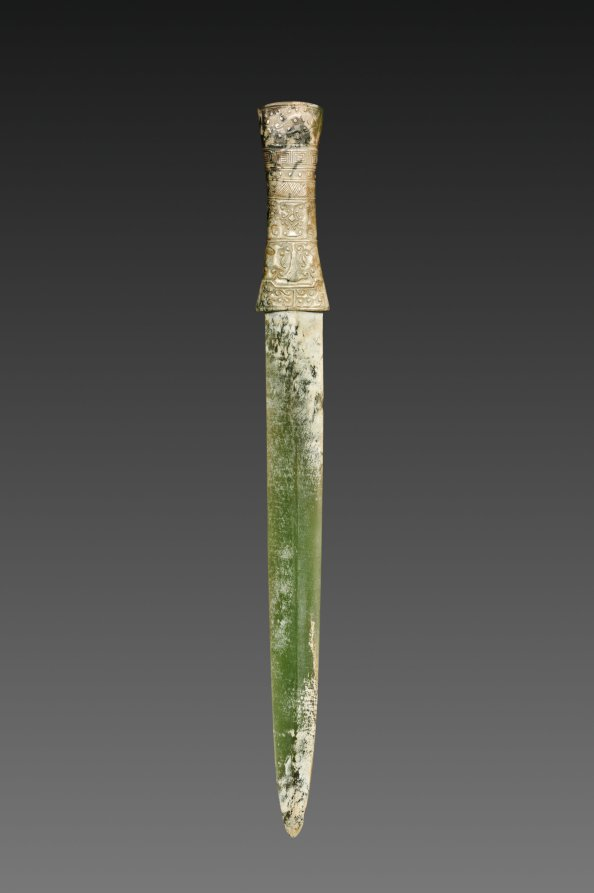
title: Ceremonial Knife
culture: China, Qing dynasty (1644–1911)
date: 1700s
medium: green jade, partly clarified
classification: Jade